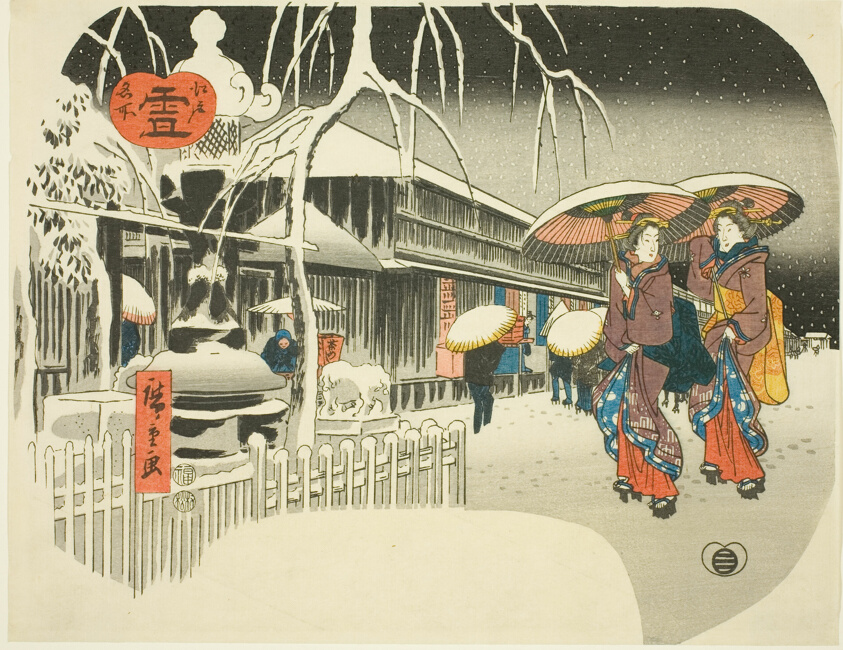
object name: Print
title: Snow (Yuki), from the series "Famous Places of Edo (Edo meisho)"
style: Japanese (culture or style)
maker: Utagawa Hiroshige 歌川 広重; Japanese, 1797–1858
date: c. 1849/52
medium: Color woodblock print; uchiwa-e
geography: Japan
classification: woodblock print; print; asian art